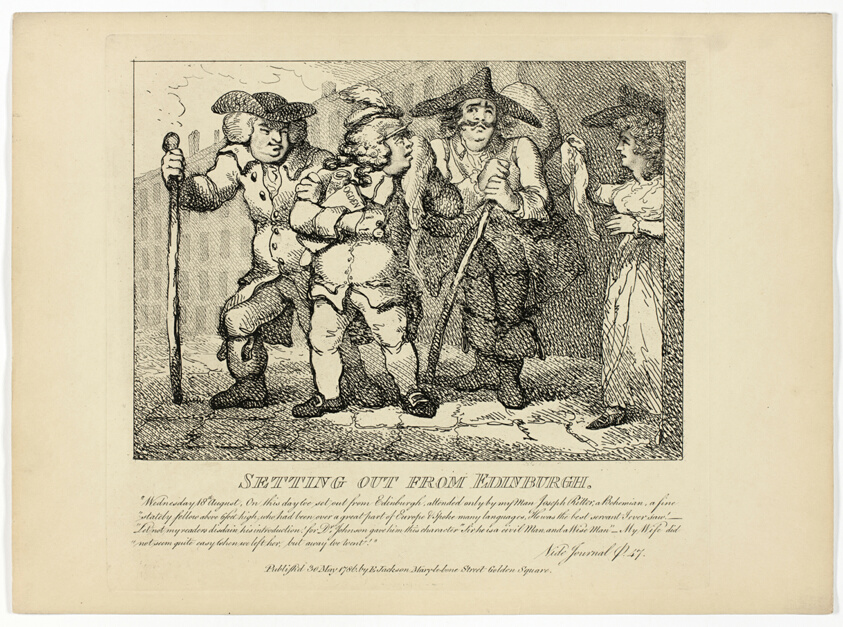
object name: Print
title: Setting Out from Edinburgh, from Boswell's Tour of the Hebrides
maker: Thomas Rowlandson (English, 1756-1827)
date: 1786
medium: Etching on paper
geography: England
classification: etching; print; prints and drawing